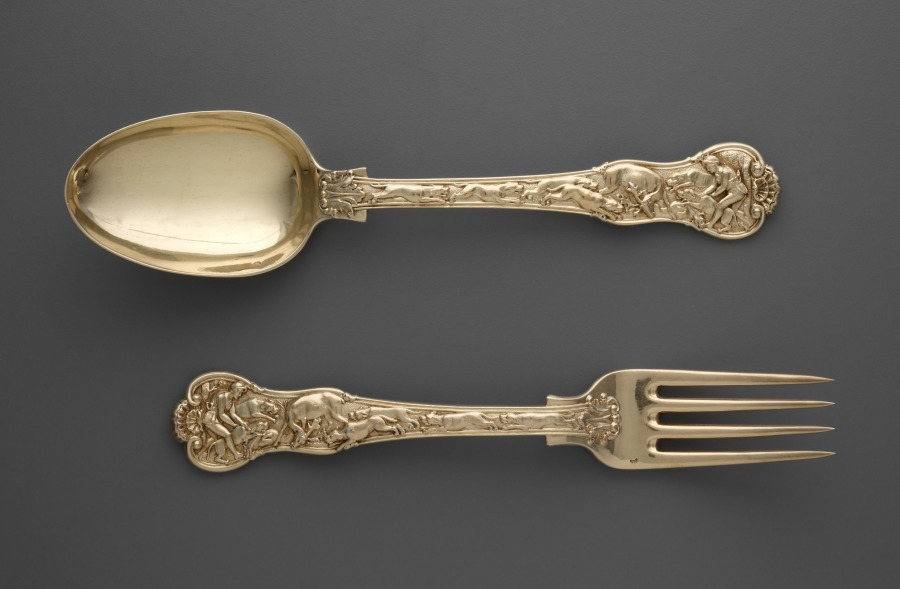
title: Dessert Fork and Spoon with Hunt Scenes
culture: England, London, 19th century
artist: Paul Storr (British, 1771–1844)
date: c. 1822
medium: gilt silver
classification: Silver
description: Paul Storr was perhaps the most famous and successful English silversmith working in the early 19th century. This fork and spoon were originally part of a larger set. The exceptionally high quality of the metalworking and gilding of these pieces is typical of Storr's work.